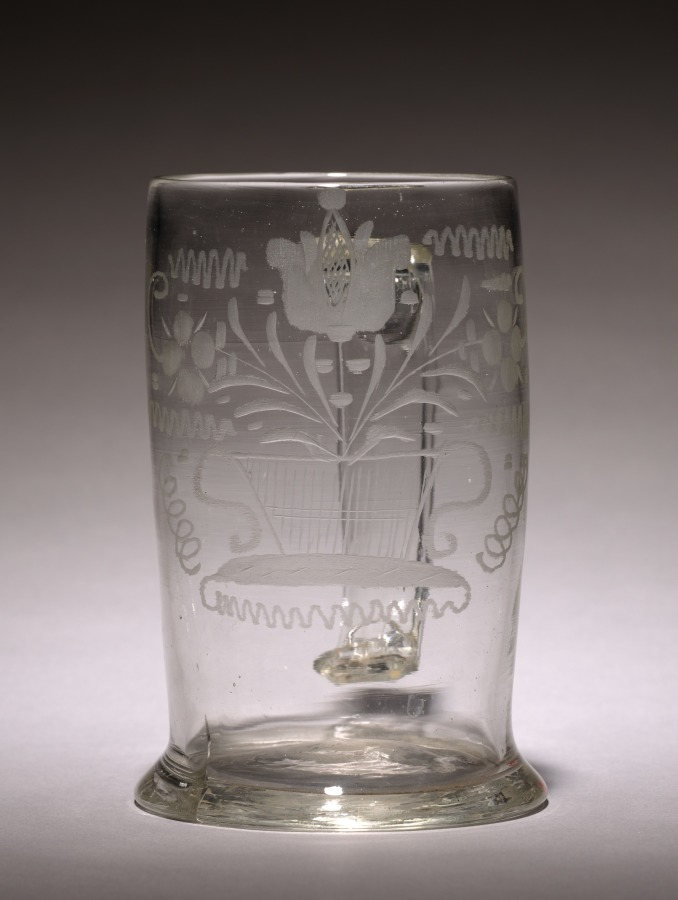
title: Handled Mug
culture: America, Stiegel Type, 18th century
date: 1700s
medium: glass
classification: Glass